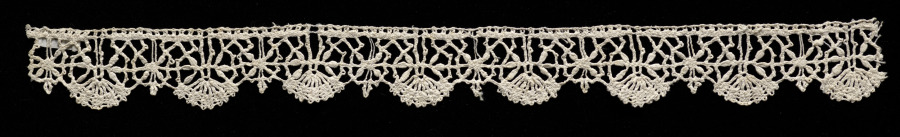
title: Lace Edging of Bell Points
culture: Italy, Genoa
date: 1600s–1700s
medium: Bobbin lace (rose lace)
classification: Lace